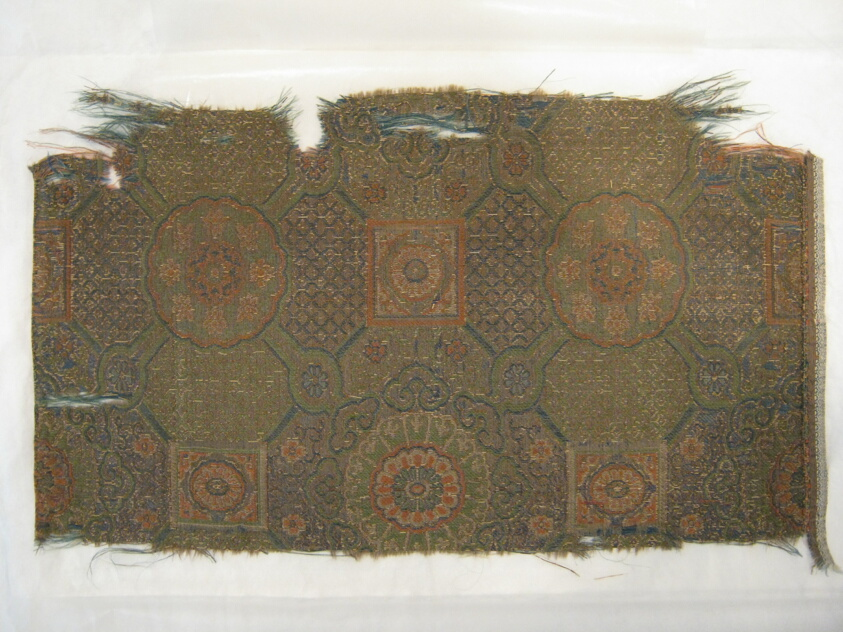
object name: Textile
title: Fragment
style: late edo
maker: Japan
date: 18th century, late Edo period (1789–1868)/ Meiji period (1868–1912)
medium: Plain compound satin, silk and silvered paper; 2 strips to m.m.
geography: Japan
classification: textile; weaving